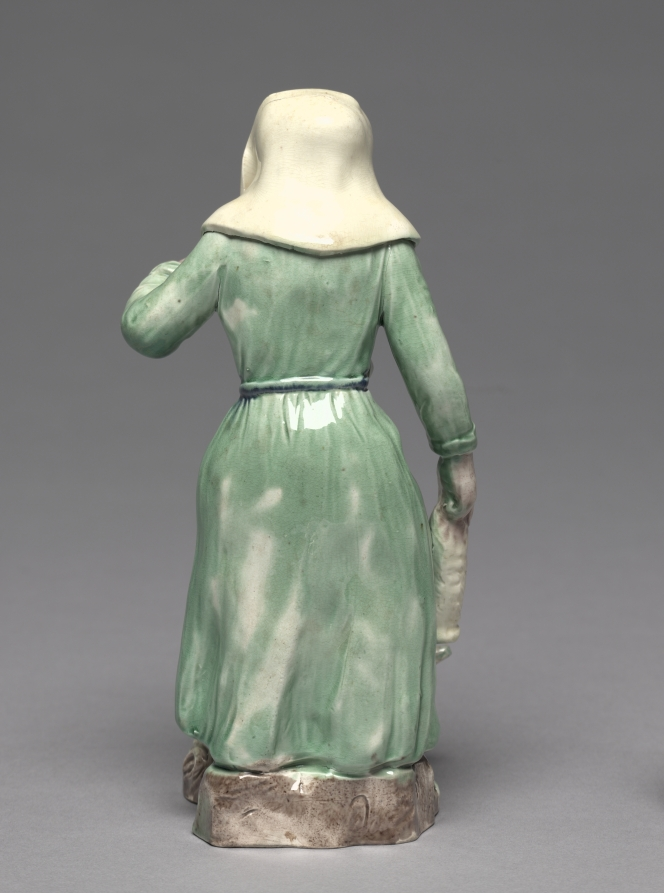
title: Old Woman Feeding Chickens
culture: England, Staffordshire, 18th century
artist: Staffordshire Factory (British)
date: c. 1770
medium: earthenware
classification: Ceramic